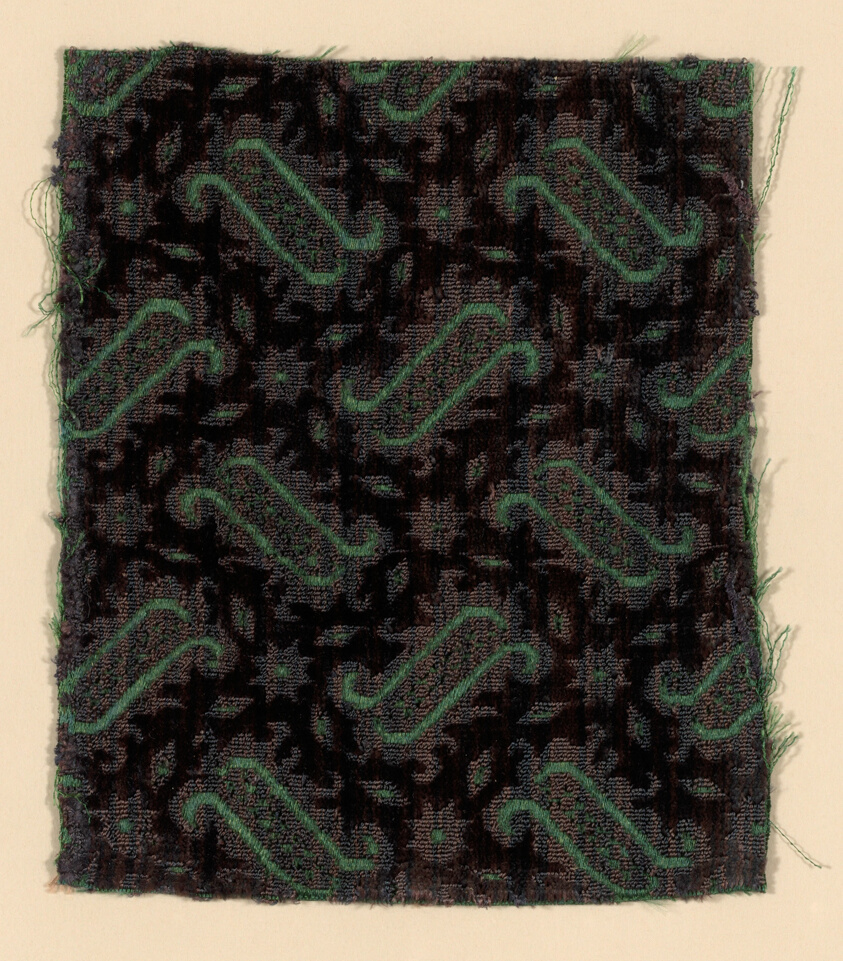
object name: Textile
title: Fragment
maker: Italy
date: 1601/35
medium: Silk, cut, uncut, voided velvet against satin weave foundation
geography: Italy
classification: textile; weaving; weaving - velvet